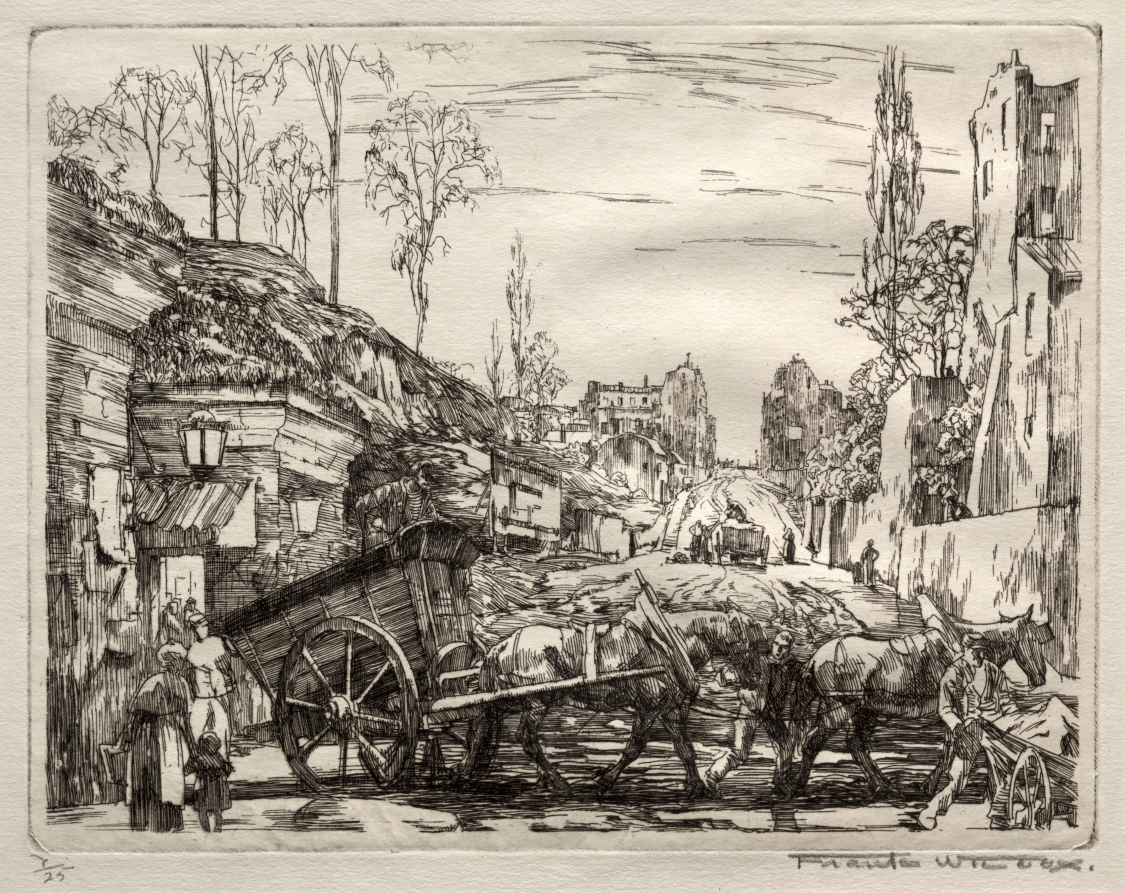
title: Paris Gate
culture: America, Ohio, Cleveland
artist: Frank Wilcox (American, 1887–1964)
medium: etching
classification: Print